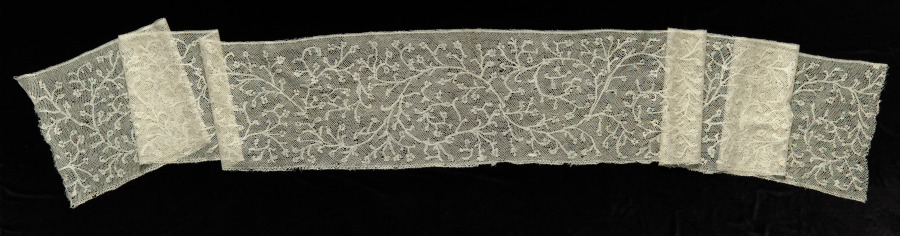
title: Lace Flounce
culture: Italy, Abruzzi, Pescocostanzo ?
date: 1800s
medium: Linen: bobbin lace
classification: Lace